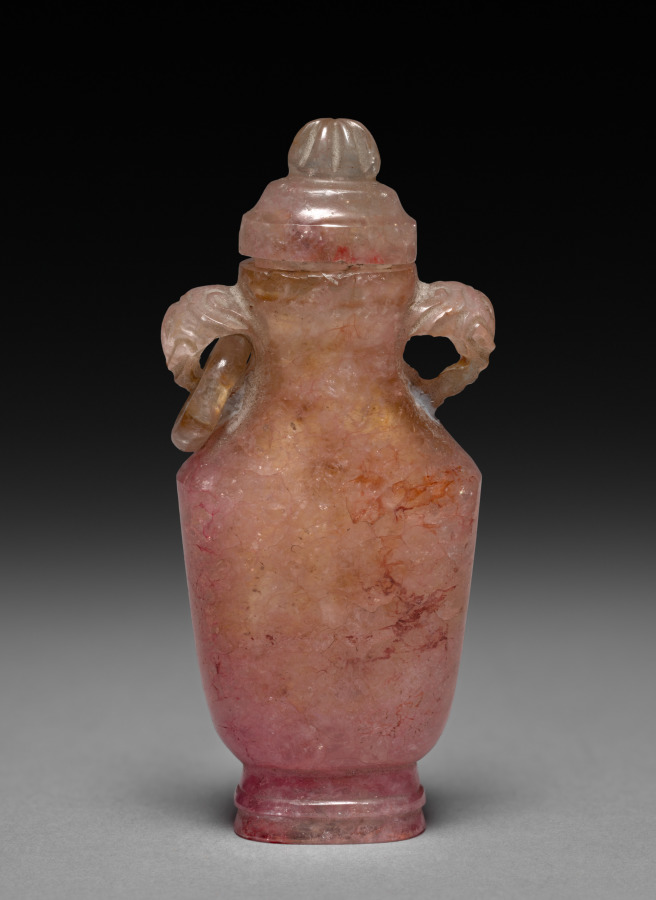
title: Miniature Jar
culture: China, Qing dynasty (1644-1911)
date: 19th-early 20th century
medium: jade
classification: Jade